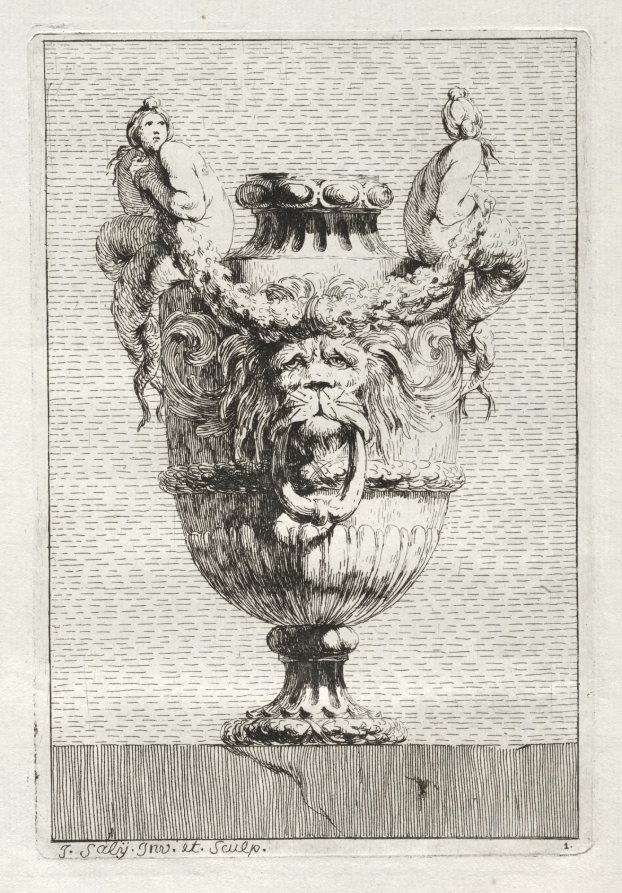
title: Suite of Vases: Plate 1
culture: France, 18th century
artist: Jacques François Saly (French, 1717–1776)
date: 1746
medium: etching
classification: Print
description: Designing ornamental vases or urns was particularly popular during the mid-18th century since the only limit to the possibilities was the imagination of the artist. Saly, a sculptor by training, was a student at the French Academy in Rome from 1740 to 1746, at which time he published a set of 30 etchings. Saly began with basic antique vase forms but deviated from classical ornament to use a rich variety of fantastic creatures for embellishment.